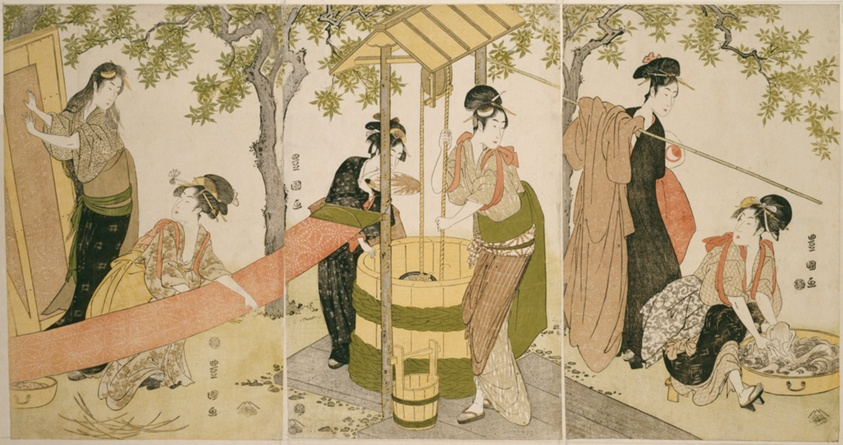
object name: Print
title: Doing the Laundry by the Well Curb (Idobata no sentaku to araihari)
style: Japanese (culture or style)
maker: Utagawa Toyokuni I 初代 歌川 豊国; Japanese, 1769–1825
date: c. 1795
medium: Color woodblock prints; oban triptych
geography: Japan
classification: woodblock print; print; asian art